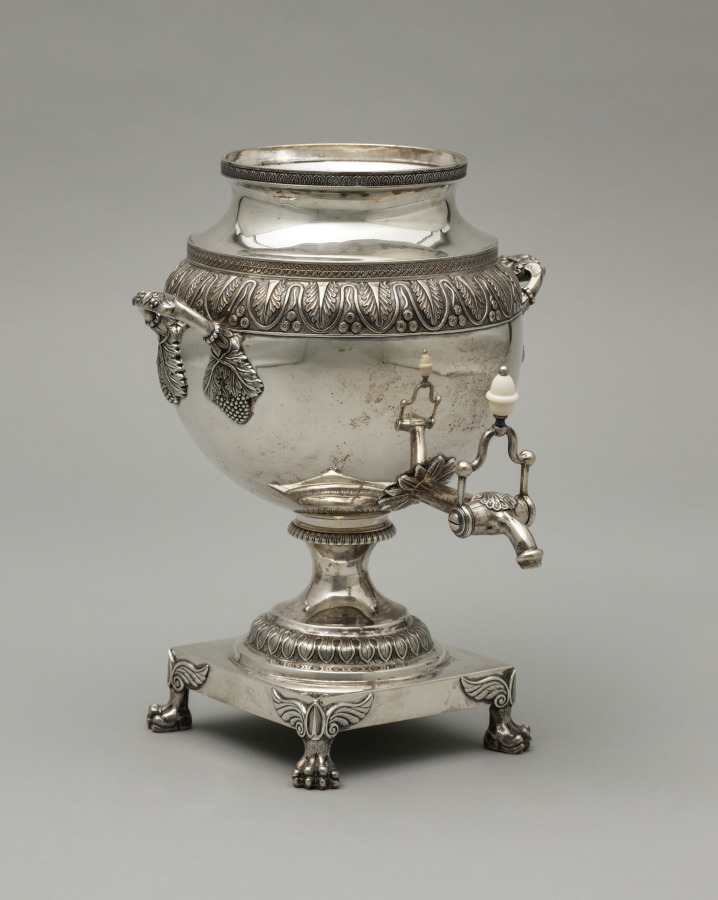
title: Tea Urn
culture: America, Pennsylvania, Philadelphia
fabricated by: Harvey Lewis (American, 1835)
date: 1811–25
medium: silver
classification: Silver